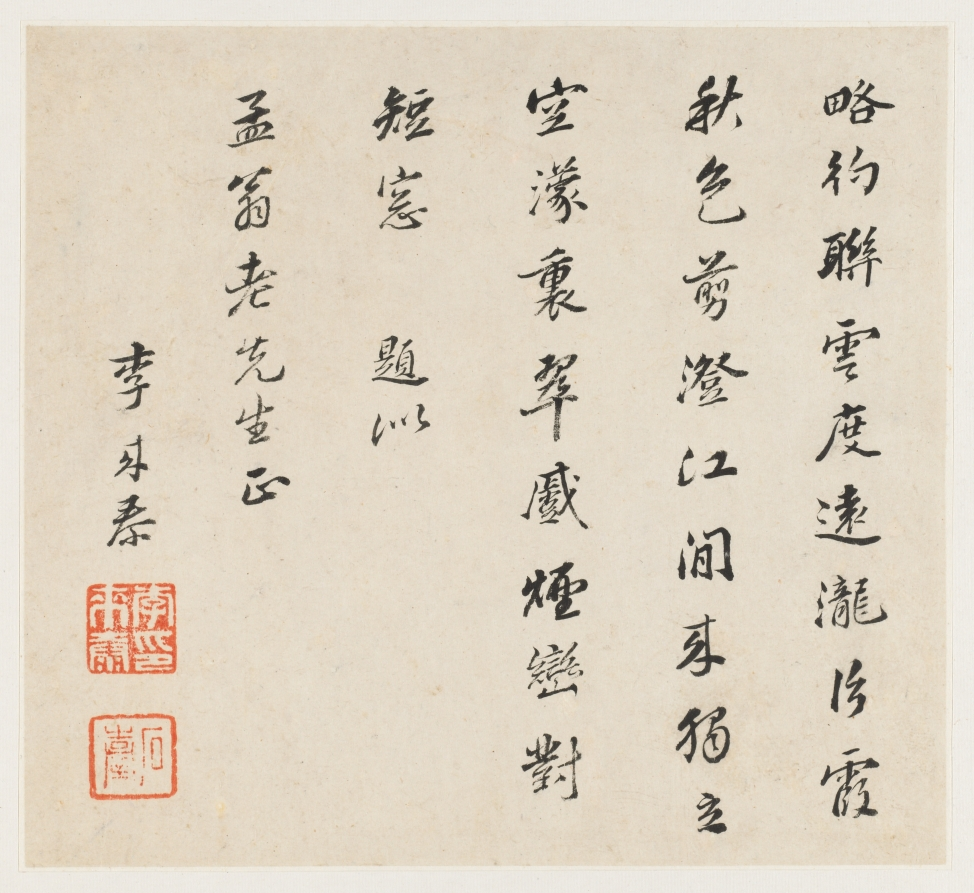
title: Album of Landscapes: Leaf 3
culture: China, Qing dynasty (1644-1911)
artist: Wang Gai (Chinese, active c. 1677–1705)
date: 1677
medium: album leaf, ink and light color on paper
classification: Painting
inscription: Poem by Li Lai-t'ai